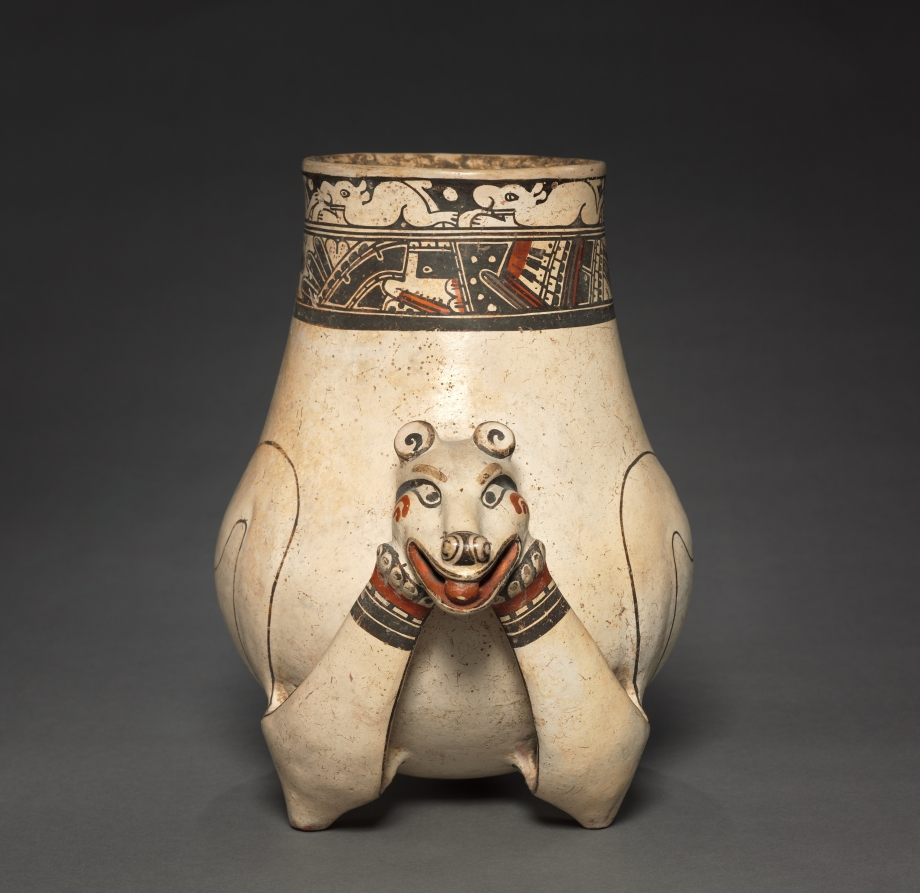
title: Animal Effigy Vessel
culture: Costa Rica, Southern Nicoya region, Pataky Polychrome style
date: 1000–1550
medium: earthenware with colored slips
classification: Ceramic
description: The Pataky style excells in animal portrayals that combine a modeled head with a flat vessel chamber that doubles as the animal’s body. It may be important that many of these animals strike human poses; creatures that combine the human and animal often have mythic import.